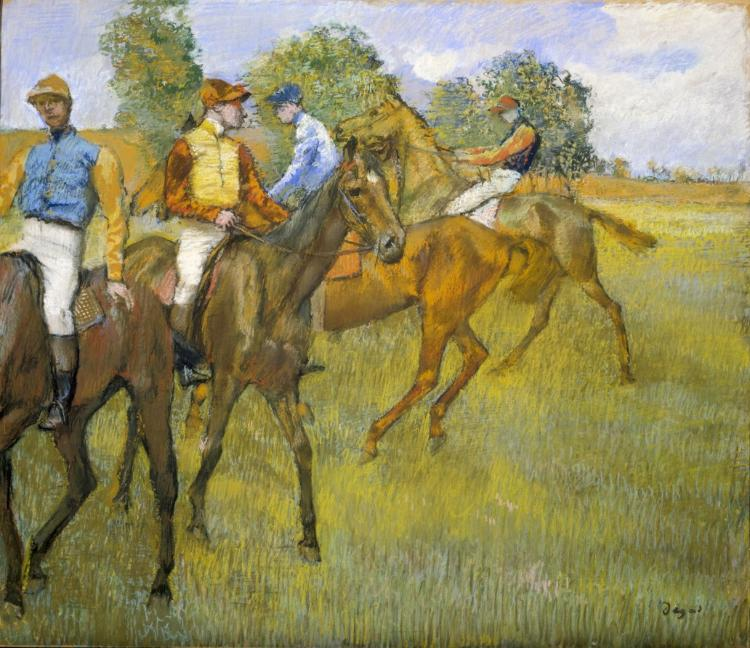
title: Before the Race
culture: France, 19th century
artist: Edgar Degas (French, 1834–1917)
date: c. 1887–89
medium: pastel with charcoal underdrawing on tracing paper mounted on cardboard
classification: Drawing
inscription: signed, lower right, in black pastel: Degas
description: Degas returned to the theme of horse and rider time and again throughout his career. Scholars believe that he executed the first version of this composition of four jockeys on horseback in a charcoal and pastel drawing. Several years later, he traced the composition, reversing its orientation to create the highly finished Cleveland pastel. The palette is intensified, the distance between the second and third jockeys is increased, and the foliage along the horizon has been added to suggest a lush spring day.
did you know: When creating the series to which this pastel belongs, Edgar Degas was inspired by the 19th-century photographer Eadweard Muybridge, who attempted to record motion in static images.